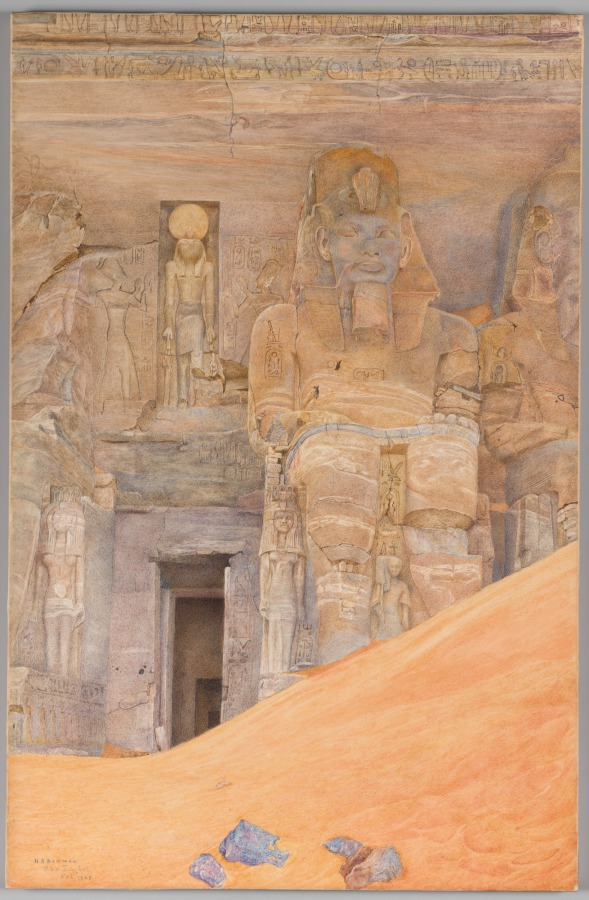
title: Abu Simbel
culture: America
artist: Henry Roderick Newman (American, 1833–1918)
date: 1907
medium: watercolor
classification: Drawing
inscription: lower left, in blue watercolor: H R Newman / Abu Simbel / Feb. 1907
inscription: verso: in graphite on wooden panel, below the horizontal support: Abu Simbel / 1907 / This picture must not (must and not underlined twice) be removed / from the panel (be removed from the panel: each word underlined once) / HRN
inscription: upper right, in graphite: 66050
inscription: purple black stamp below horizontal crossbar and just below the inscription: CHARLES ROBERSON & Co / ARTISTS’ COLOURMEN / Manufacturers of / WATER & OIL COLOURS, / MATERIALS FOR / Drawing & Painting. / 99, LONG ACRE, LONDON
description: This watercolor provides a close-up view of the Abu Simbel temples, which were buried in sand until their rediscovery in the 19th century. The American artist Henry Roderick Newman portrayed their architecture in multiple drawings between 1894 and 1913. In this later work, he meticulously layered dots and other marks to capture the tonality of sand and desert light.